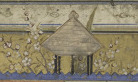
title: Yusuf and Zulaykha (recto), from an Anthology of Persian Verses, including the Haft Awrang (Seven Thrones) of Jami: The Fifth Throne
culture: Iran, Shiraz or Mashhad, Safavid period (1501–1722)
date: c. 1556–65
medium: Gum tempera, ink, and gold on paper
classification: Manuscript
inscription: Script: Nasta'liq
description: The painting quotes verses from the Haft Awrang (Seven Thrones) by the Persian poet Jami, a classic of Persian literature, here illustrating the romance of Yusuf and Zulaykha. Originally rooted in the Qur’an (Surah Yusuf, chapter 12), the Prophet Yusuf (Joseph) encounters the wife of the Egyptian governor, traditionally identified as Zulaykha, both seated opposite each other on the right, framed by architecture.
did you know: Figs and pomegranates, being served to the couple, are symbolic of fertility.